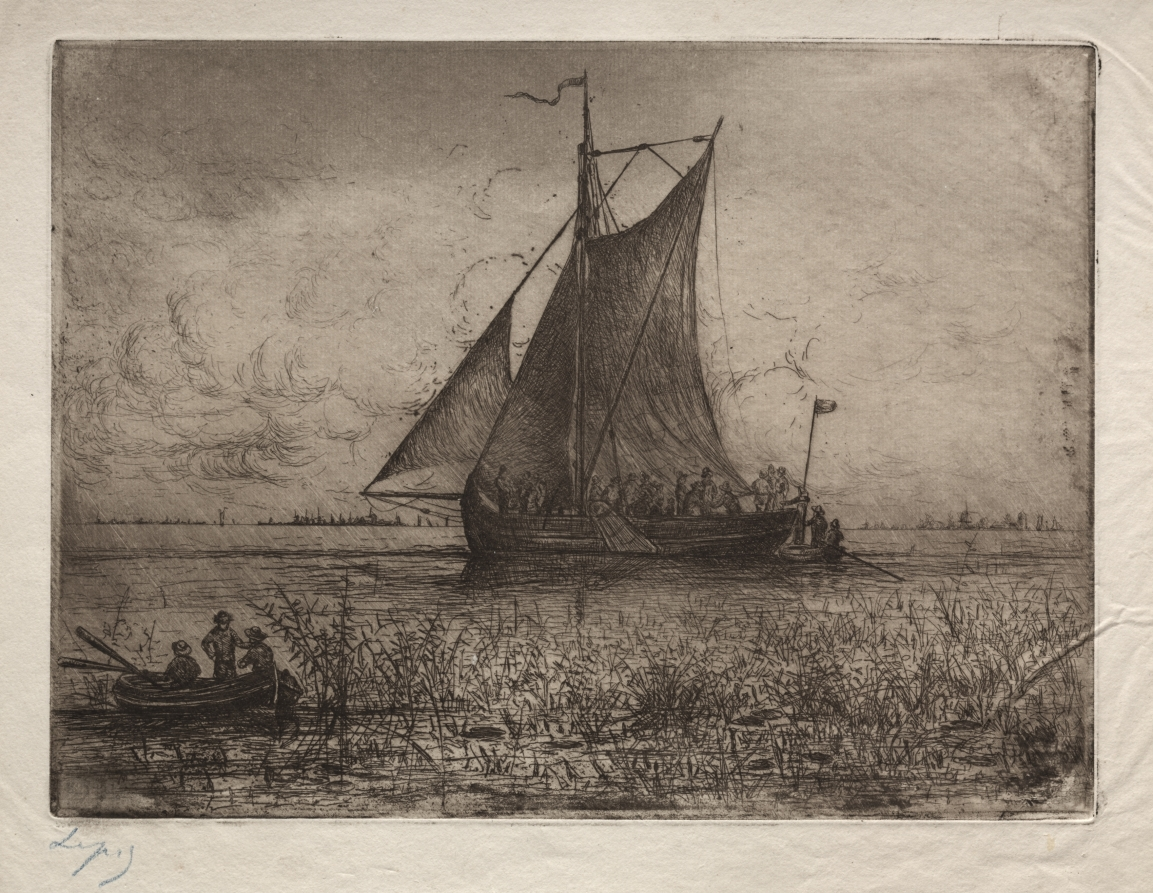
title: Dutch Riverscape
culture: France, 19th century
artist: Ludovic Napoléon, Vicomte Lepic (French, 1839–1889)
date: c. 1860–89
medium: etching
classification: Print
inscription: lower left, in blue crayon: Lepic